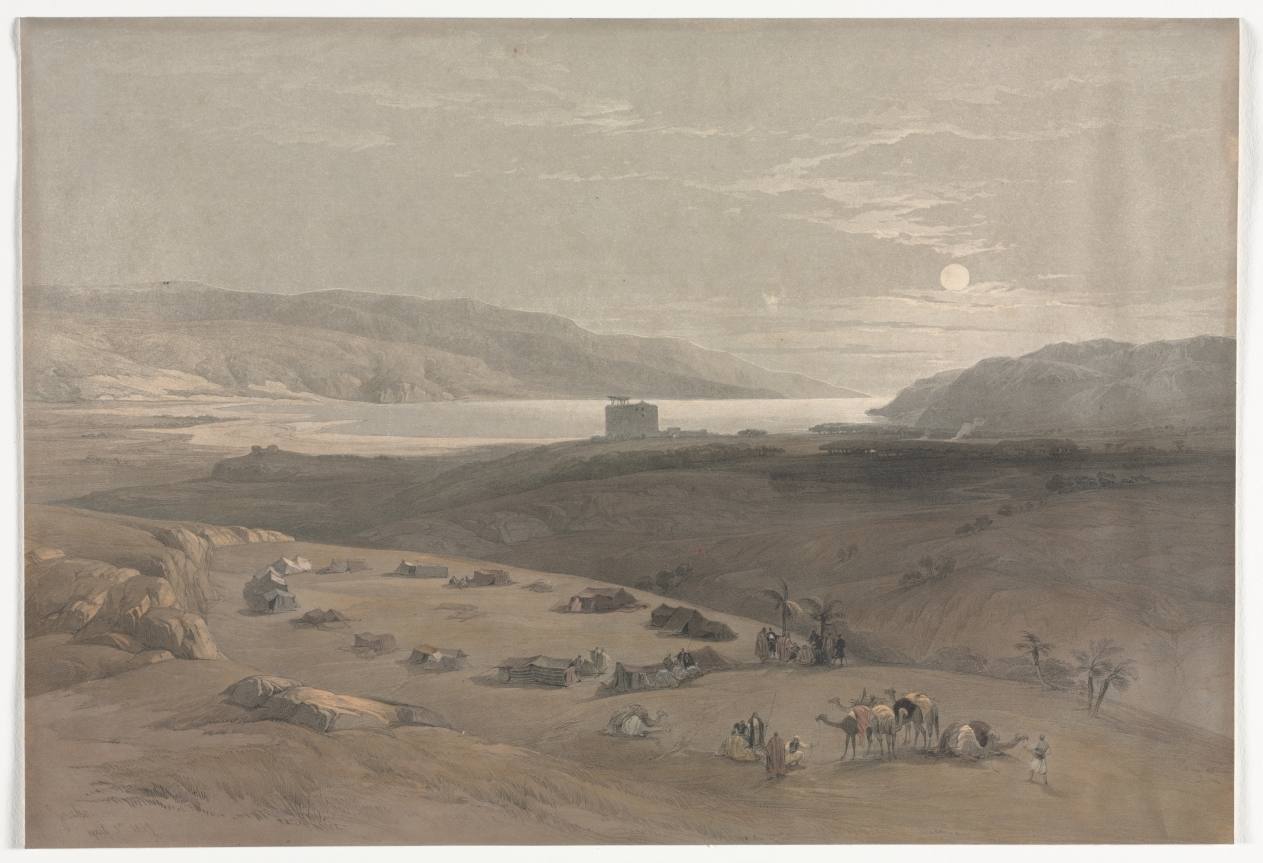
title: Jericho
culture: England, 19th century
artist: David Roberts (Scottish, 1796–1864)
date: 1839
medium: color lithograph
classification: Print